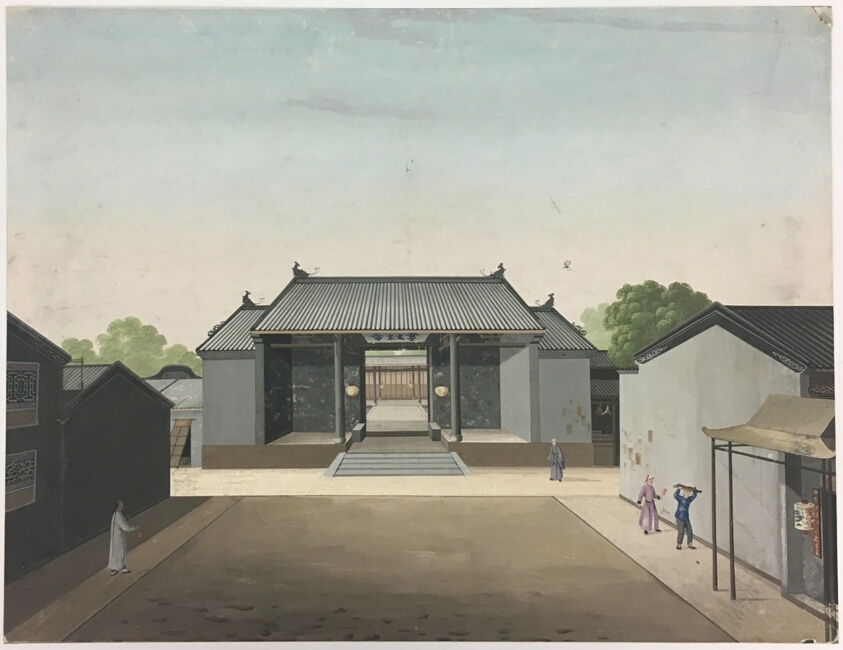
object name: Painting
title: Spinning Cloth, Preparing Tea Leaves, Preparing Silk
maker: China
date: Early 19th century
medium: Colors on paper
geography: China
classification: painting; asian art; print